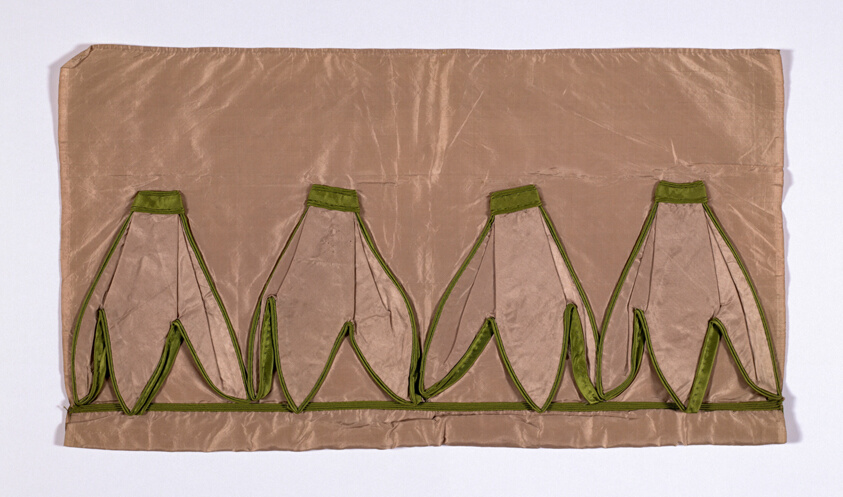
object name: Textile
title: Sample (Dress Trimming)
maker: England or France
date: 1815/35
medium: Silk, plain weave; appliquéd with silk, plain weave, edged with silk, satin weave and cording covered with silk, satin weave; lined with cotton, plain weave; sized; cotton padding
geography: France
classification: textile; costume; needlework - costume; weaving